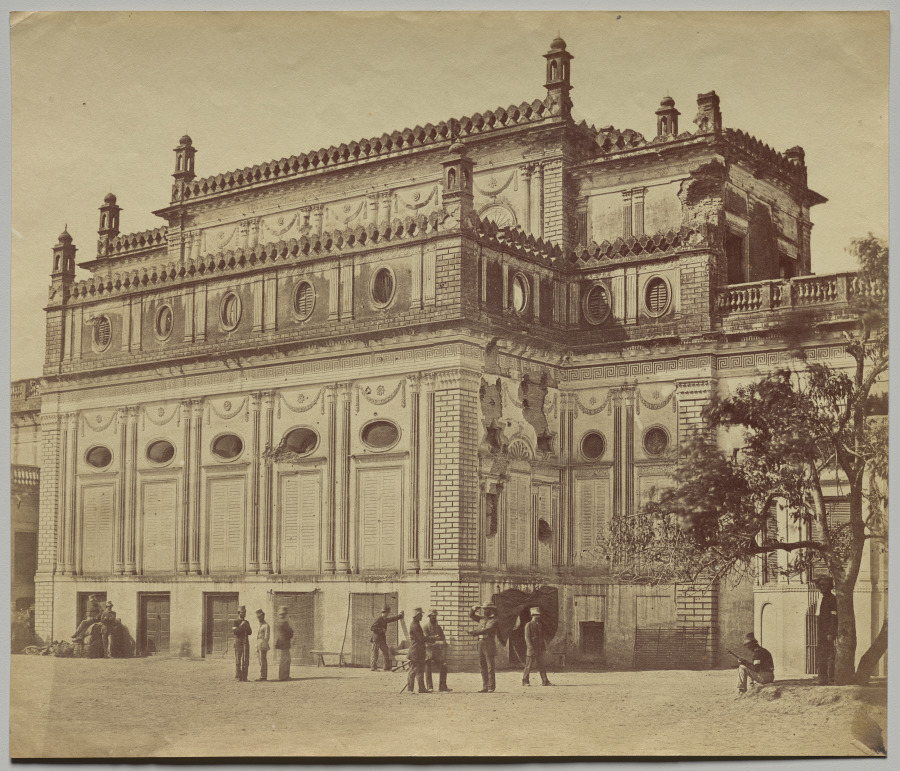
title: The Begum Kotie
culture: England, 19th century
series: Lucknow After the Siege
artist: Felice A. Beato (British, 1832–1909)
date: 1858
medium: albumen print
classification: Photograph